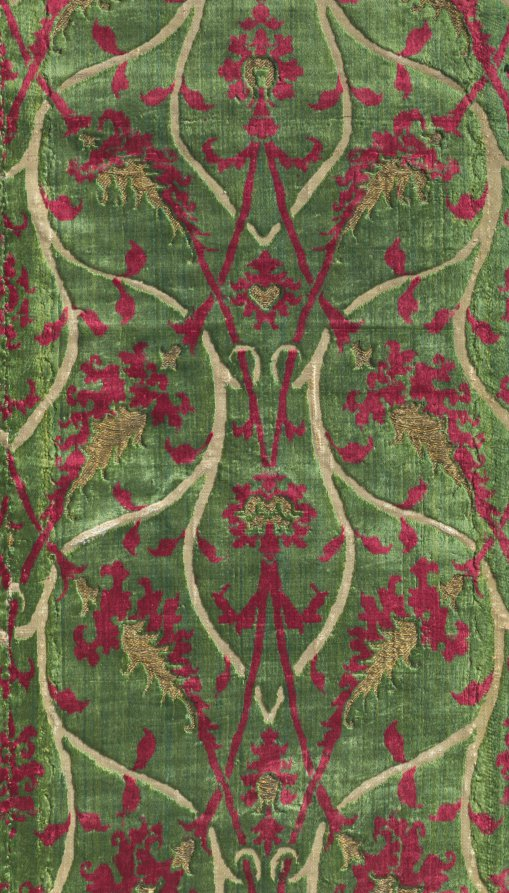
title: Two-color Velvet with Gold in a Double Curved Lattice Pattern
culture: Italy, possibly Florence, 15th century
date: 1450–1500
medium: silk, gold thread; polychrome velvet: cut pile, brocaded, and voided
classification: Velvet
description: Although plain velvets were woven in Italy by the end of the 13th century, polychrome-patterned velvets were not produced until the late 14th century. This velvet with two colors of pile incorporates a limited amount of costly gold thread while a fourth color, ivory, is formed by the satin weave of the foundation, called voided velvet. Palmette leaves composed of gold thread and crimson pile dominate the pattern on the green pile ground. The palmettes are arranged in an overlapping curved layout, popular in Italy and in Ottoman Turkey during the second half of the 15th century.